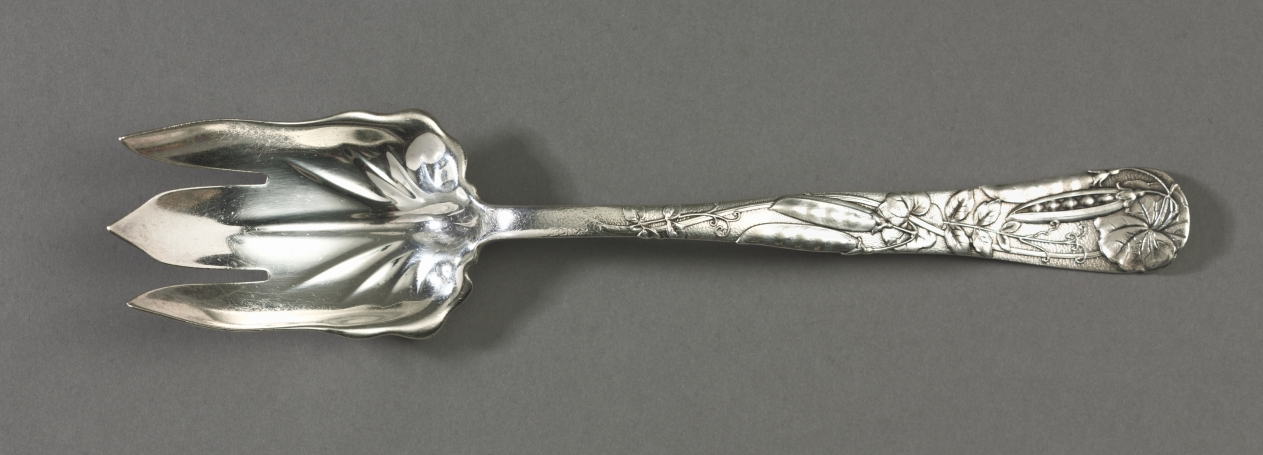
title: Vine Pattern Salad Fork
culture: America, New York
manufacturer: Tiffany & Co. (America, New York, est. 1837)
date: c. 1872–80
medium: silver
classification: Silver